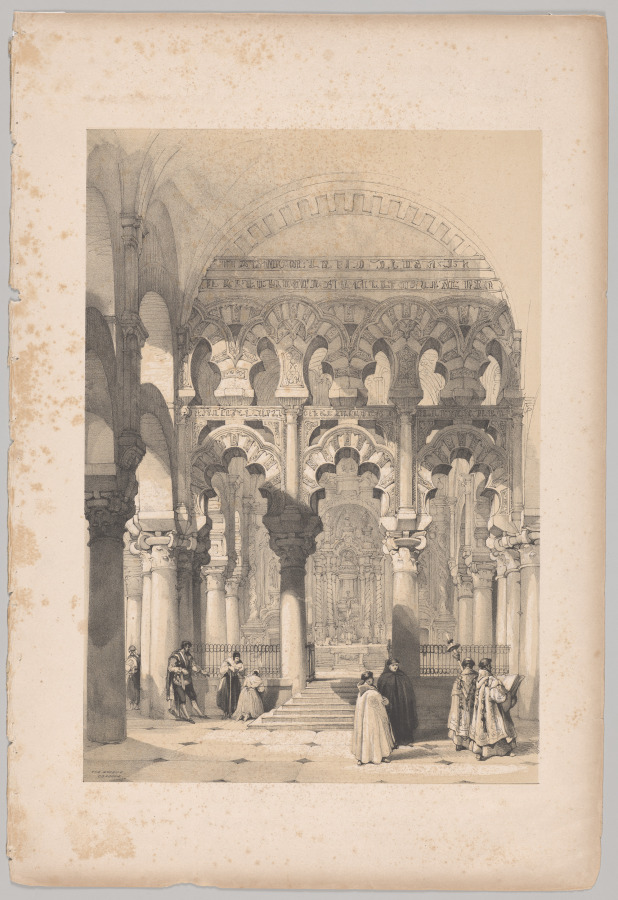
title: Picturesque Sketches in Spain: The Mosque, Cordova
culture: England, 19th century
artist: Thomas Shotter Boys (British, 1803–1874)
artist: after David Roberts (Scottish, 1796–1864)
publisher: Hodgson & Graves, 6, Pall Mall, London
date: 1837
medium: lithograph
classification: Print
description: This print shows the Mosque of Cordoba, in Andalusia, southern Spain, being used as a Catholic cathedral. The site was a mosque from 785 through 1236, when it was converted into a cathedral under the Christian kingdom of Castile. Today the building includes both Islamic and Christian architectural elements. The scalloped archway recalls the period in which the Moors, a Muslim cultural group, ruled parts of Spain and Portugal. An altar with a crucifix is visible, and the Christogram IHS (an abbreviation of the first three letters of Jesus’s name in Greek) can be seen on one priest’s shoulder.